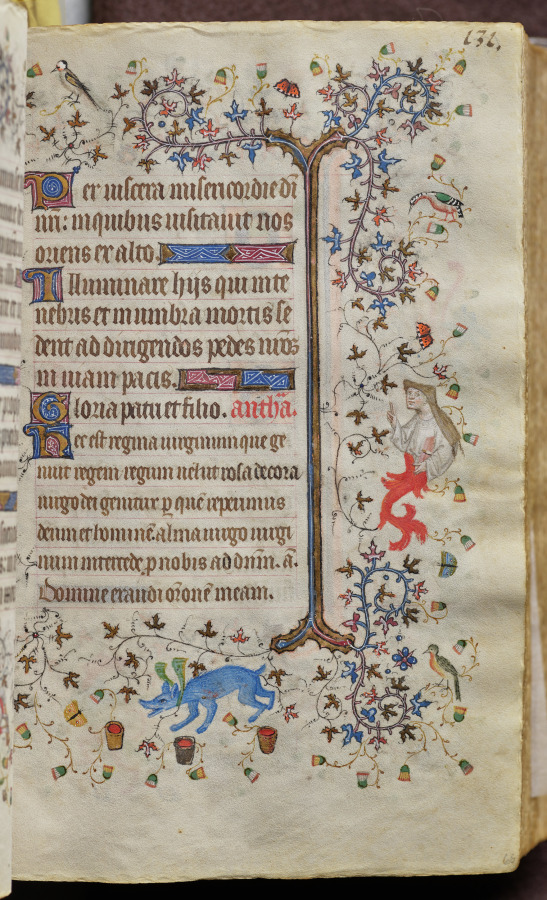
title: Hours of Charles the Noble, King of Navarre (1361-1425): fol. 66r, Text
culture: France, Paris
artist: Master of the Brussels Initials and Associates (French)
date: c. 1405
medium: ink, tempera, and gold on vellum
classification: Bound Volume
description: This precious volume was obviously highly prized by its owner, the French-born King of Navarre, who had his coat of arms painted on no less than twenty folios. Rather than directly commissioning this manuscript from a specific workshop, it seems that Charles the Noble acquired his book of hours -- perhaps ready-made for the luxury market -- while on a trip to Paris in 1404-05. A collaborative effort, six painting styles are evidenced within the pages of this codex, those of two Italians, two Frenchmen, and two Netherlanders. The painter who was responsible for the planning and decoration of the book, and who produced seventeen of the large miniatures, was a Bolognese artist known as the Master of the Brussels Initials. His principal assistant, responsible for most of the borders, was a Florentine who signed his name "Zecho" da Firenze on folio 208 verso.